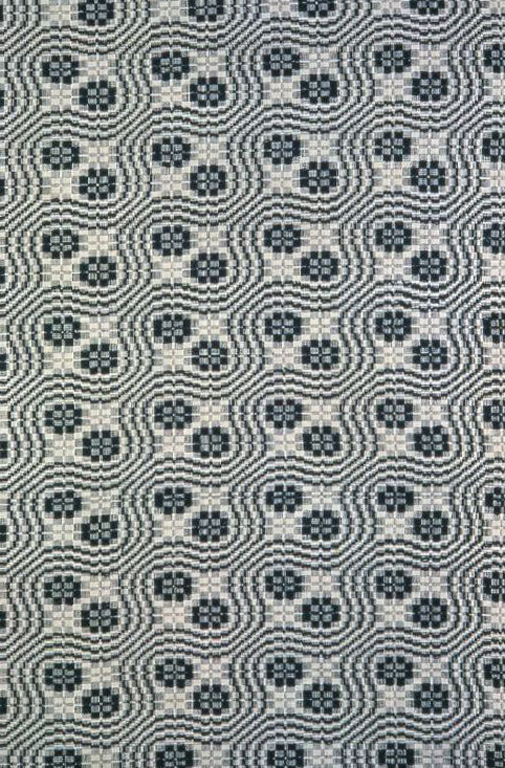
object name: Textile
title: Coverlet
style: 19th century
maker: United States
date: 1820/30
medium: Cotton and wool, plain weave with supplementary patterning weft (overshot)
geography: United States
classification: weaving - coverlet; coverlet; textile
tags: geometric motif, squares, snowflake, grids, geometric, coverlet